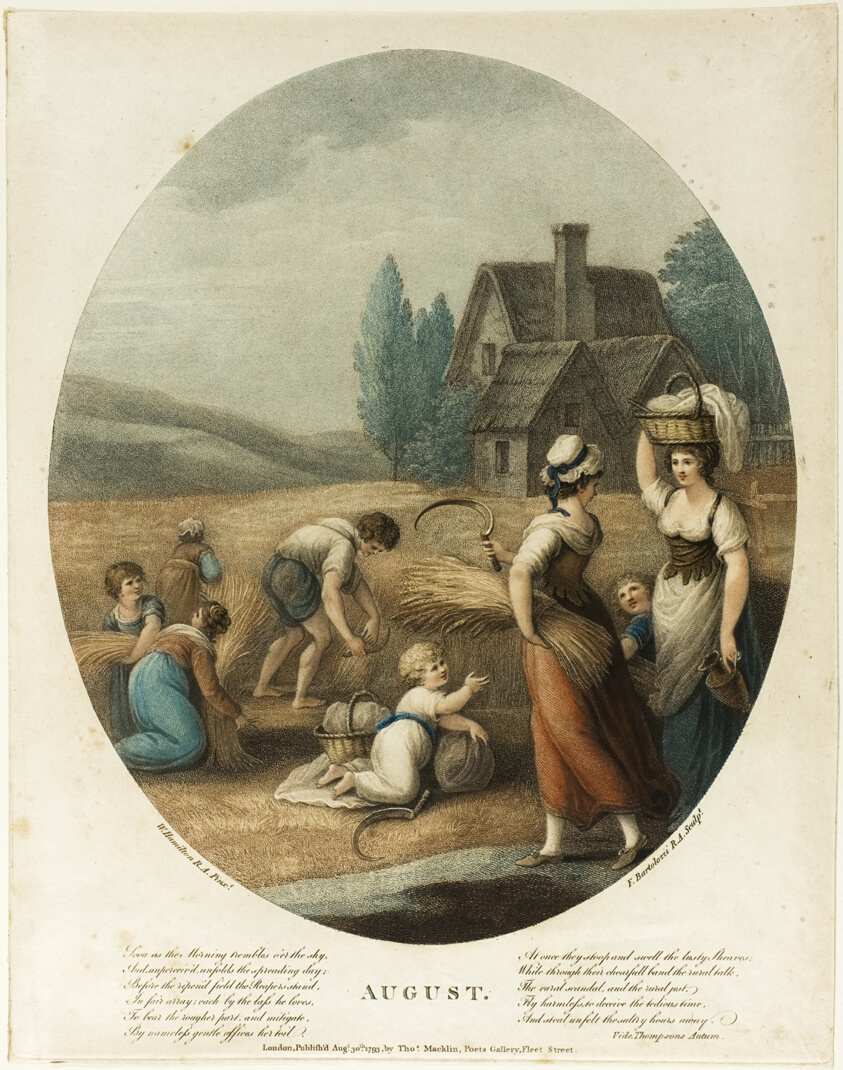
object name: Print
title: August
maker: Francesco Bartolozzi (Italian, 1727-1815); after William Hamilton (English, 1751-1801); published by John and Josiah Boydell (English, 18th century)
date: August 30, 1793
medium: Color stipple engraving on paper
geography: Italy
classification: engraving; print; prints and drawing